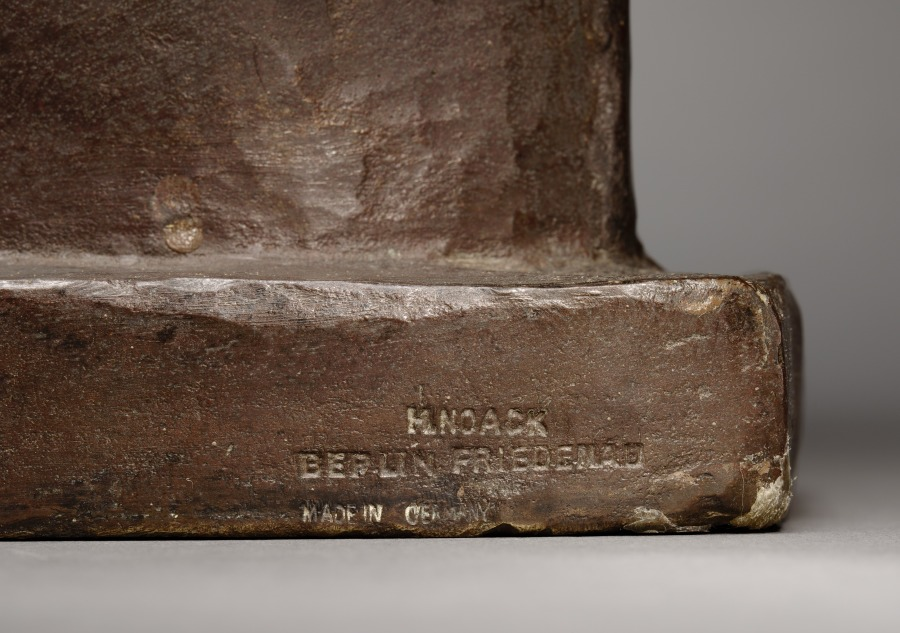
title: Adagio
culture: Germany, 20th century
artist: George Kolbe (German, 1877–1947)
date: 1923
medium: gilt bronze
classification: Sculpture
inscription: Signed lower left corner: "GK II"